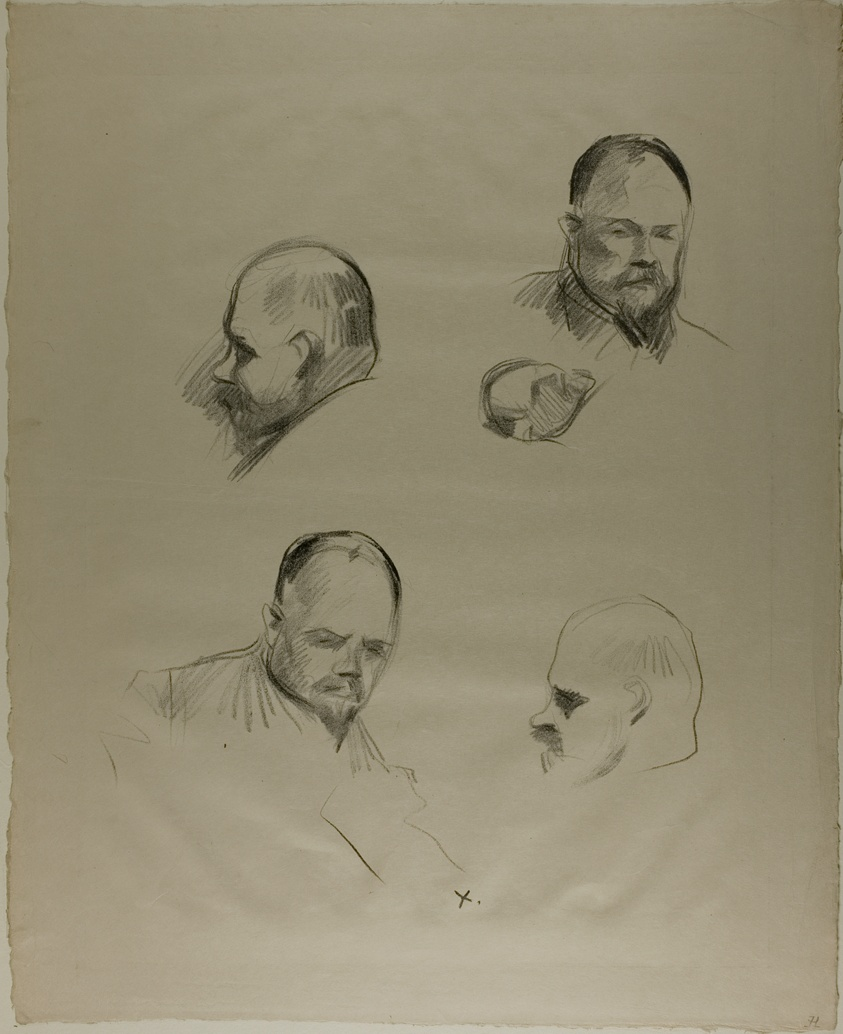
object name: Print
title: Ambroise Vollard, Four Sketches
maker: Jean Louis Forain (French, 1852-1931)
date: c. 1910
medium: Lithograph on cream wove paper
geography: France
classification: lithograph; print; prints and drawing